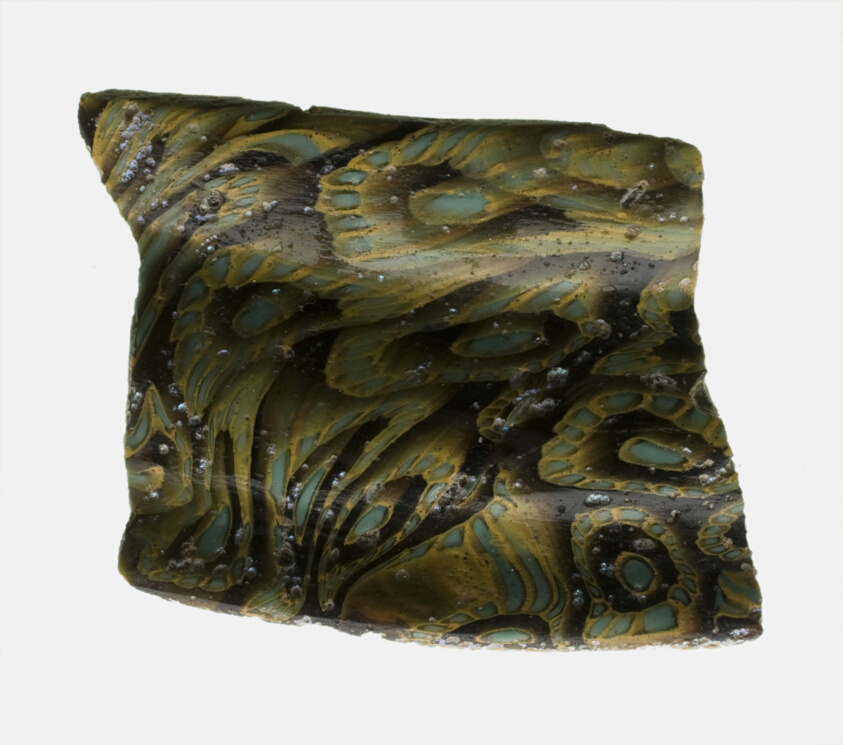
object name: Decorative Arts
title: Fragment of a Bowl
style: roman (ancient, style or period), ancient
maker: Roman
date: 1st century BCE–1st century CE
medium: Glass, mosaic glass technique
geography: Roman Empire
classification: fragment; decorative arts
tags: decoration